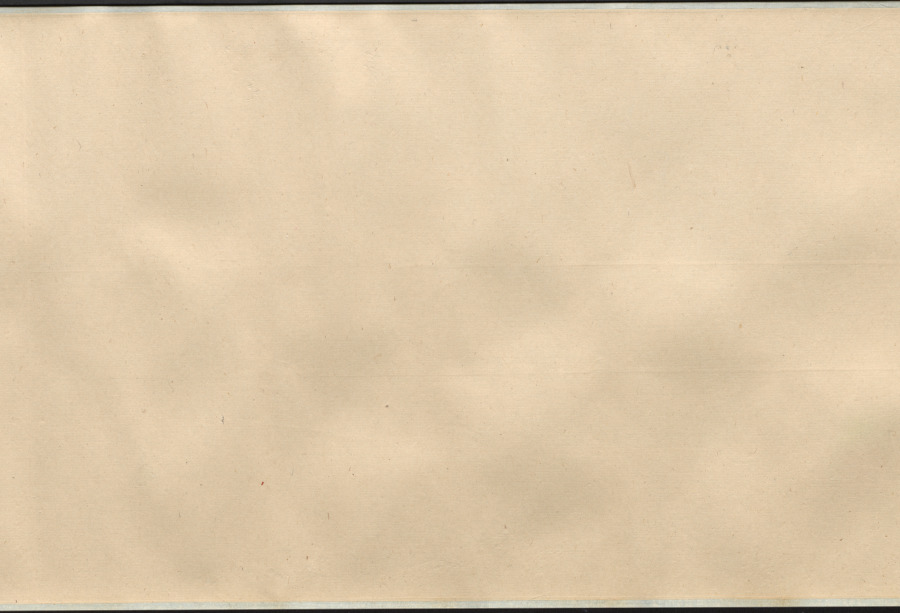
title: Rocks, Orchid, and Bamboo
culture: China, Qing dynasty (1644-1911)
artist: Shitao (Chinese, 1642–1707)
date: 1662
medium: handscroll; ink on paper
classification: Painting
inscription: Title colophon in four characters with signature and two seals on gold-flecked paper.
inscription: Artist's signature, inscription (with date of 1662), five seals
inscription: Colophon with two seals.